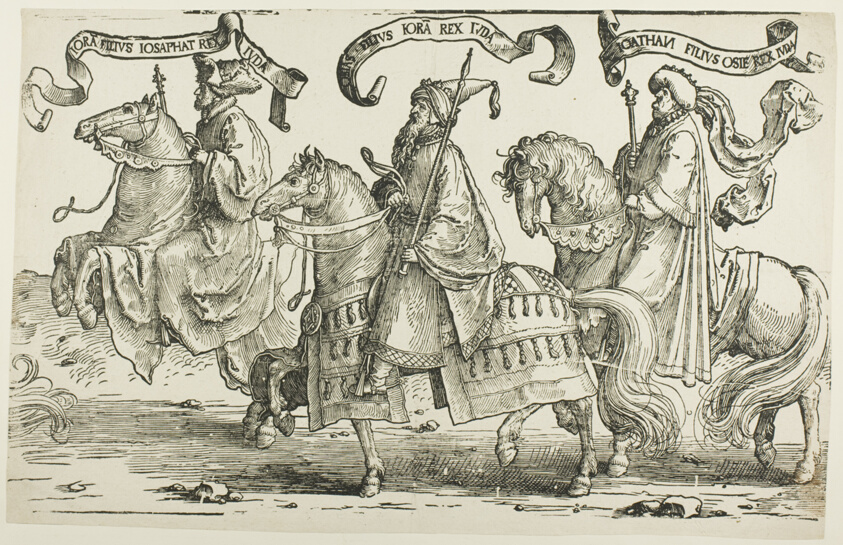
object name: Print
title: Jehoram, Uzziah, Jotham, plate three, from The Twelve Kings of Israel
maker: Lucas van Leyden (Netherlandish, c. 1494-1533)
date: c. 1520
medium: Woodcut in black with touches of pen and brown ink on buff laid paper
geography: Netherlands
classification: woodcut; print; prints and drawing